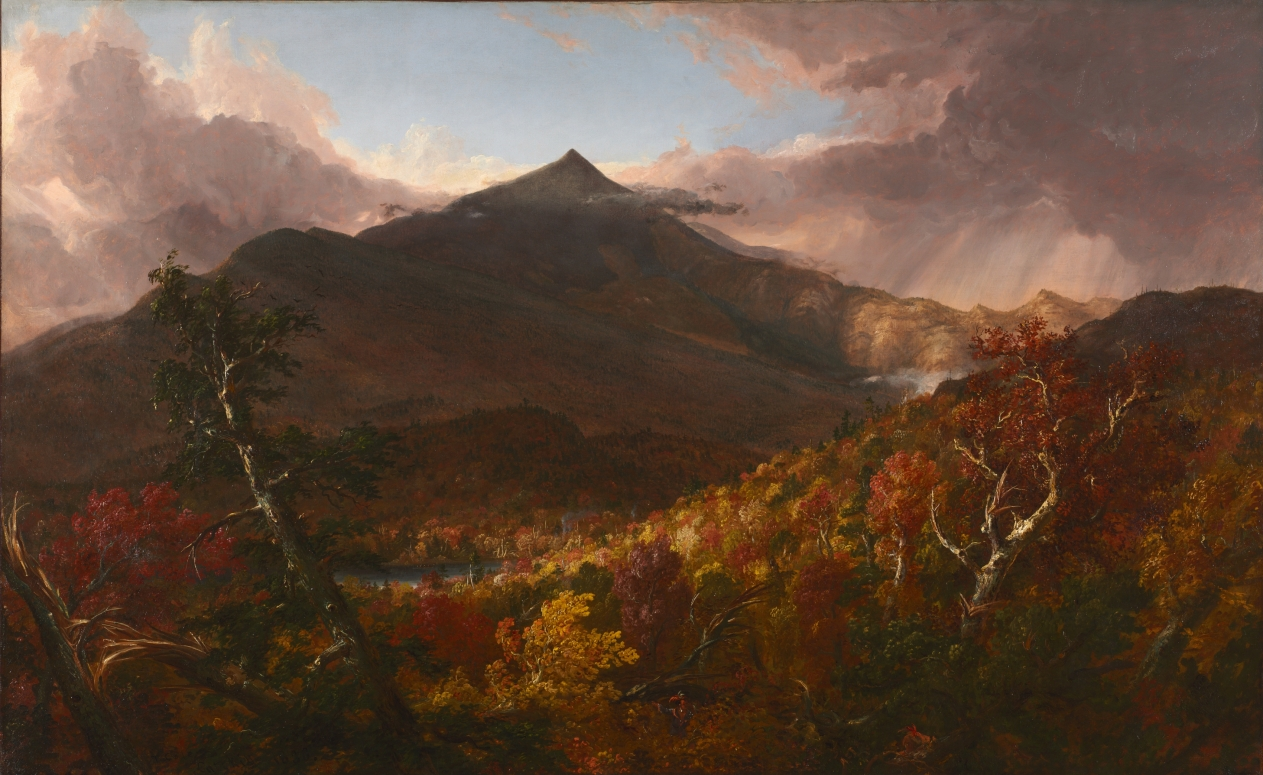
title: View of Schroon Mountain, Essex County, New York, After a Storm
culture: America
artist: Thomas Cole (American, born England,1801–1848)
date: 1838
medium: oil on canvas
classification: Painting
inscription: signed lower left: T. Cole / Catskill 1838.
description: Championing the American wilderness, Cole declared, "We are still in Eden," in his Essay on American Scenery, published two years before he painted this view of the Adirondacks. The artist sketched the scene in early summer, but when he created the painting in his studio, he rendered it in a dramatic blaze of fall colors. Such a choice likely had nationalistic overtones; he once proclaimed that autumn was "one season where the American forest surpasses all the world in gorgeousness." Cole included two Indigenous men in the painting’s right foreground foliage. At this time, the Adirondacks remained home to many Native Americans long after most had been forcibly removed from land east of the Mississippi River. While continuing to live, hunt, and fish in the area, these Algonquian and Iroquoian peoples were compelled to significantly adapt their existence amid increasing White settlement and its attendant lumber, mining, and tourist industries.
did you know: Nicknamed "Schroon Mountain" by the artist, the peak's official name is Hoffman Mountain.